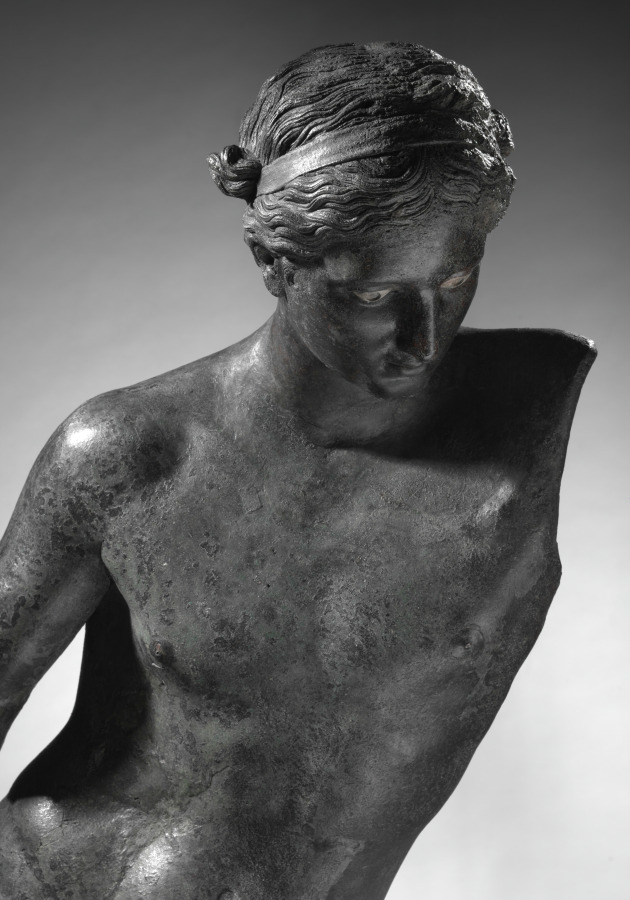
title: The Cleveland Apollo: Apollo Sauroktonos (Lizard-Slayer) or Apollo the Python-Slayer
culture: Greece, Athens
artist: attributed to Praxiteles (Greek, Athenian, c. 400–330 BCE)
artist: or Follower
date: c. 350–200 BCE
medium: bronze, copper and stone inlay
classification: Sculpture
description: The Cleveland Apollo was cast in multiple sections using the indirect lost-wax technique. First, molds were taken from a working model (now no longer known or preserved), which was then reproduced in hollow wax sections, each filled with a clay core. After details were added to the wax models, each was encased in clay. Then, the wax was heated, melted out, and replaced by molten bronze. Once cooled, the hollow bronze sections were fused together and finished, patching flaws and adding inlays and other details. Since the initial model was retained, it could be reused, allowing ancient sculptors to create multiples and variations of favorite works. Thus, remarkably, the Cleveland Apollo may once have been one of several such works. The consistently thin walls of the Cleveland Apollo (mostly 5-6 mm thick), together with the nearly invisible joins between most cast sections, show that it was created by highly skilled sculptors and foundry workers. Close looking reveals several noteworthy features. First, ovals atop the right foot mark a fusion weld, where molten bronze pooled to join separately cast sections. Second, small rectangular bronze patches cover parts of the surface (especially the right hip), each carefully cut and then hammered into place over holes or other casting defects. Inlaid lips, nipples, and eyes (the right ancient stone, the left now a modern replacement) added to the lifelike appearance of the sculpture, contrasting with the once bronze-colored skin. Finally, radiography helps to illuminate hidden features, such as the cast edge of the neck of Apollo.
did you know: Ovals across the top of the right foot show a clear join between separately cast sections.